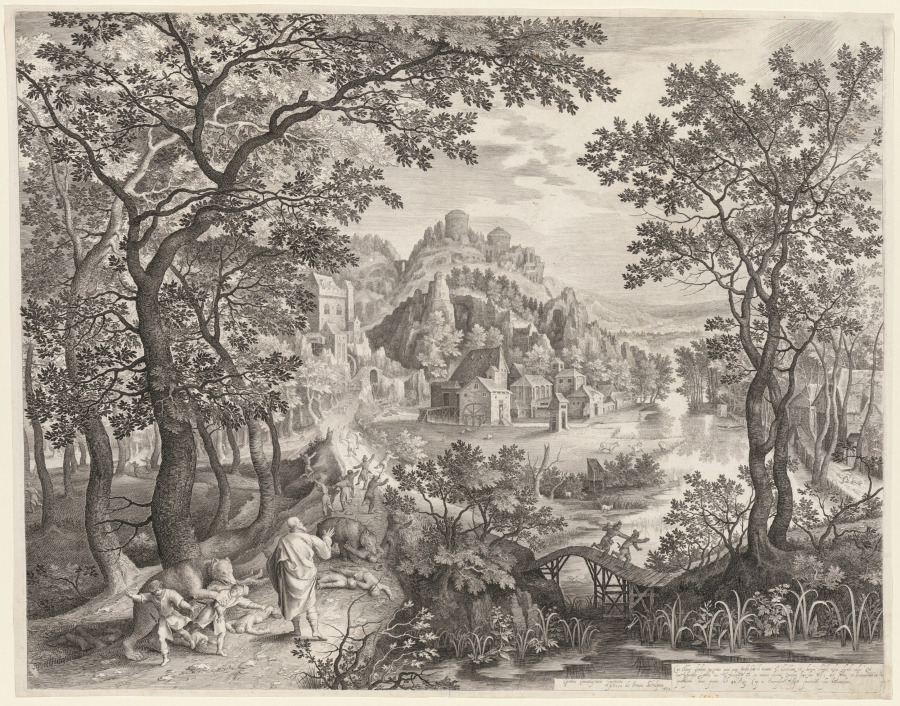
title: Elisha Cursing the Children of Bethel Who Are Being Devoured by the Bears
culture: Netherlands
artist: Nicolaes de Bruyn (Netherlandish, 1571–1656)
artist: after Gillis van Coninxloo (Netherlandish, 1544–1607)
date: 1602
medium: engraving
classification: Print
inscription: lower right, in plate: Egidius Coninxlogensis Inventor / Nicola de Bruyin Schulptor / 1602 ; lower right, in plate: Cum Elisæus ascenderet per viam pueri parvi egressi sutit de civitate E illudebant et, dicentes: ascende calve, ascende calve Qui / Cum respexisset vidit eos c'maledixit eis in nomine domini Egressique sunt duo ursi, de saltu et lacerauevunt ex Eis / quadraginte duos pueros. lib 42 Reg Cap 2 Exemplum insigne senectutem esse honorandam, ; lower left, in pen and brown in: [illegible] ; VERSO, lower left, in graphite: LeBl 334 / M53 / C6 ; lower right, in graphite: Ur gravy[illegible] 1635 ([illegible])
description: The Latin inscription in the bottom corner of the print quotes chapter two of the second Book of Kings (2 Kings 2:23-24) when the Hebrew prophet, Elisha, came upon the children of the city of Bethel who mocked him for his bald head. In the Lord's name Elisha cursed the children and all 42 were killed by two she-bears who emerged from the woods. This obscure Old Testament subject also illustrates an important moral lesson--old age must be respected. Approximating the size and tonal range of paintings by Coninxloo, prints such as these probably served as inexpensive substitutes for paintings.